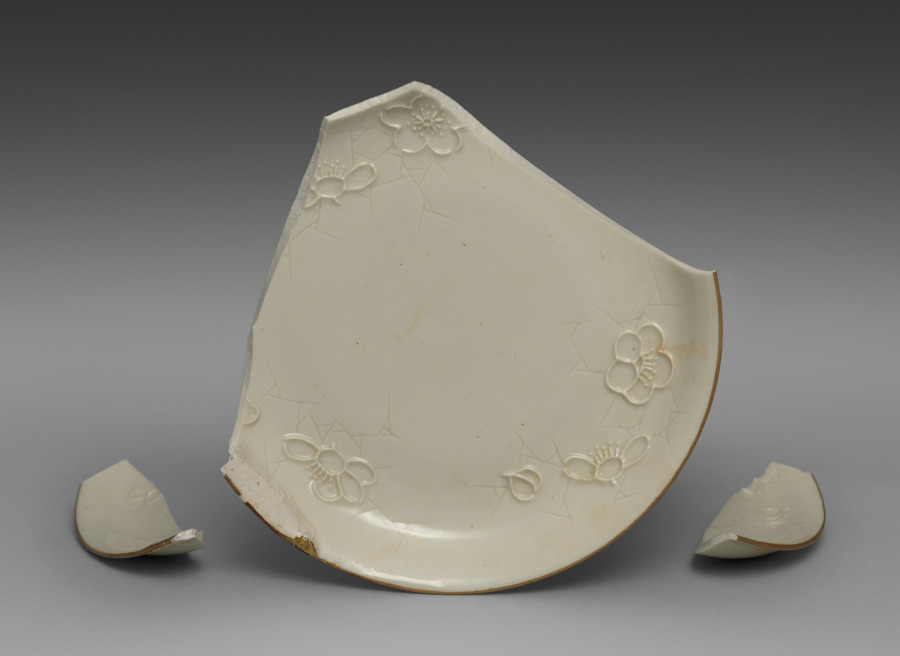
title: Medium-sized Dish from Dining Set with Plum Blossoms and Cracked-Ice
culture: Japan, Meiji period (1868–1912)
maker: Seifū Yohei II (Japanese, 1844–1878)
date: c. 1875–78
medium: Porcelain with molded designs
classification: Ceramic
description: Each item in this set has a delicate low-relief design of flowering plum branches over scattered, intersecting lines meant to resemble the cracked-ice surface of a frozen body of water and is signed on the base in gold pigment. While Yohei II produced many fine works in underglaze blue, like those produced by Kiyomizu Shichibei, he also made works in quite different styles later in his career, from the early 1870 s. In 1873, he was appointed purveyor to the Industrial Center of Kyoto Prefecture, a designation associated with Kyoto’s efforts to reach an international market through the port of Kobe; and from 1875 until his death, he was involved in national-level projects to present Japanese ceramics across the world. It was during this period that Yohei III was apprenticed to Yohei II, and it has been suggested that this set may in fact be an early example of Yohei III’s work, which he signed with his teacher’s name. Decorated with flowers resembling Japanese textile motifs, the set calls to mind the design of Yohei II’s pair of vases with plum blossoms in the Victoria and Albert Museum. Here, the elaborate trees created for a formal public exhibition setting have been translated into the approachable blossoms of the genteel domestic environment. While the designs are consistent across the pieces, each raised flower petal and pistil and each incised line in the ice was done by hand, so the cups, bowls, and dishes are similar yet unique. The bottoms of two boxes once identified the set’s owner, but the information has been deliberately obscured with black ink. However, inscriptions still visible appear to indicate two occasions, once at the end of July 1886 , and once again in June 1916 , when parts of the set were requested from Hokura in Niigata Prefecture. The location corresponds to a neighborhood in the present-day city of Jōetsu. The surname Tsuji 辻 also appears on a paper tag affixed to one of the box cloths. Future research may possibly reveal more about their provenance. A vase by Yohei III in a private collection combines the formal grandeur of the Yohei II vases in the Victoria and Albert Museum with the gentler design of this dining set, placing flowering plum trees against soft, scalloped-edge clouds resembling those in golden screens.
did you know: The dining wares have a creamy white coloration that the four boxes containing them identify as Korean in style.